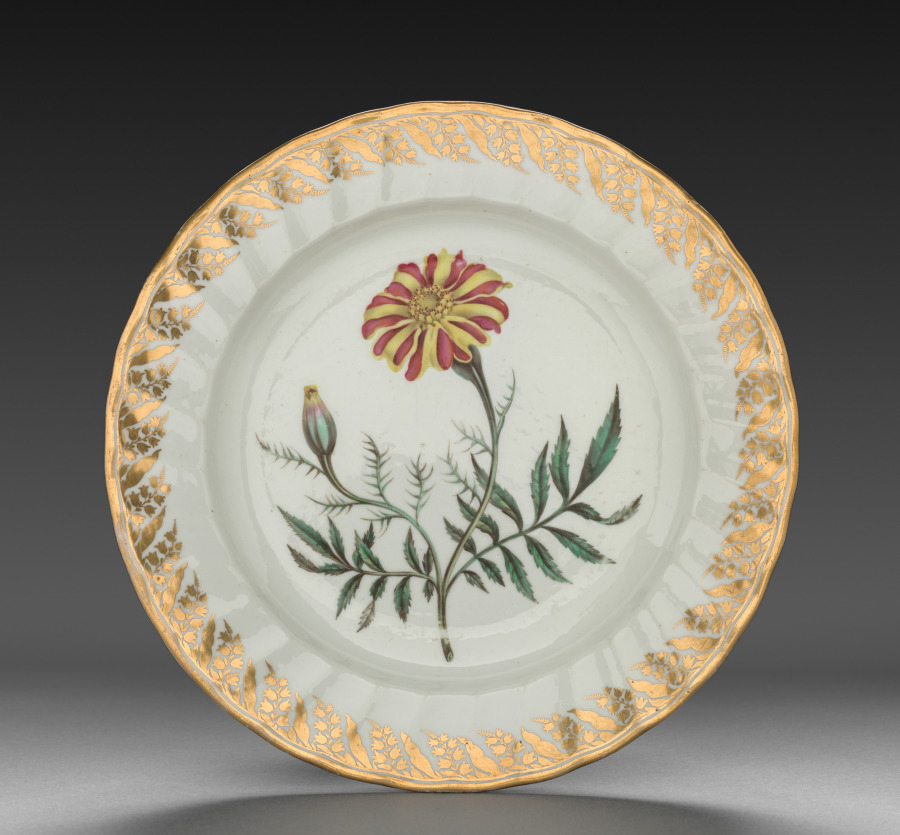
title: Plate from Dessert Service: French Marigold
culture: England, Derby, 18th century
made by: Derby (Crown Derby Period) (British)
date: c. 1800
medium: porcelain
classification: Ceramic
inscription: inscribed in blue on back: Fagitus Patula./Spreading Fagetus, or Fench Marigold./crown/crossed batons and dots/D/115.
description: Each dish is decorated with recognizable plants, the names of which are inscribed on the base in both Latin and English. Identifying the blossoms only became customary in the late 18th century when a single piece of porcelain was decorated with one species, and flowers were represented along with leaves, stems, seed pods, and roots. All of this reflects Carolus Linnaeus’s recent invention of a scientific method to categorize all known flora. The decorations on the Derby factory’s products derive from contemporary English botanical publications. For instance, illustrations in William Curtis’s The Botanical Magazine served as models for the French marigold and nettle-leaved bell flower on the dessert service.